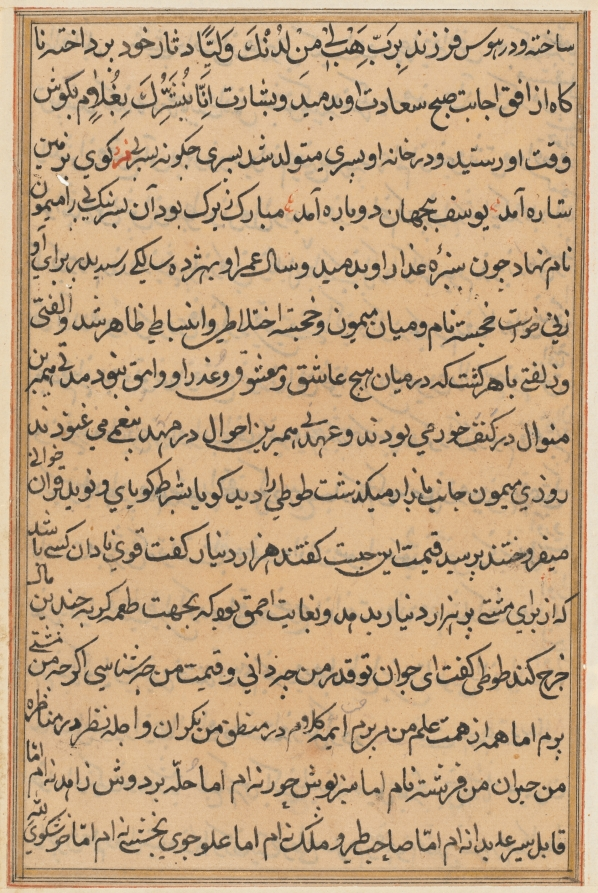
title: Page from Tales of a Parrot (Tuti-nama): text page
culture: Mughal India, court of Akbar (reigned 1556–1605)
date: c. 1560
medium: gum tempera, ink, and gold on paper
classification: Painting